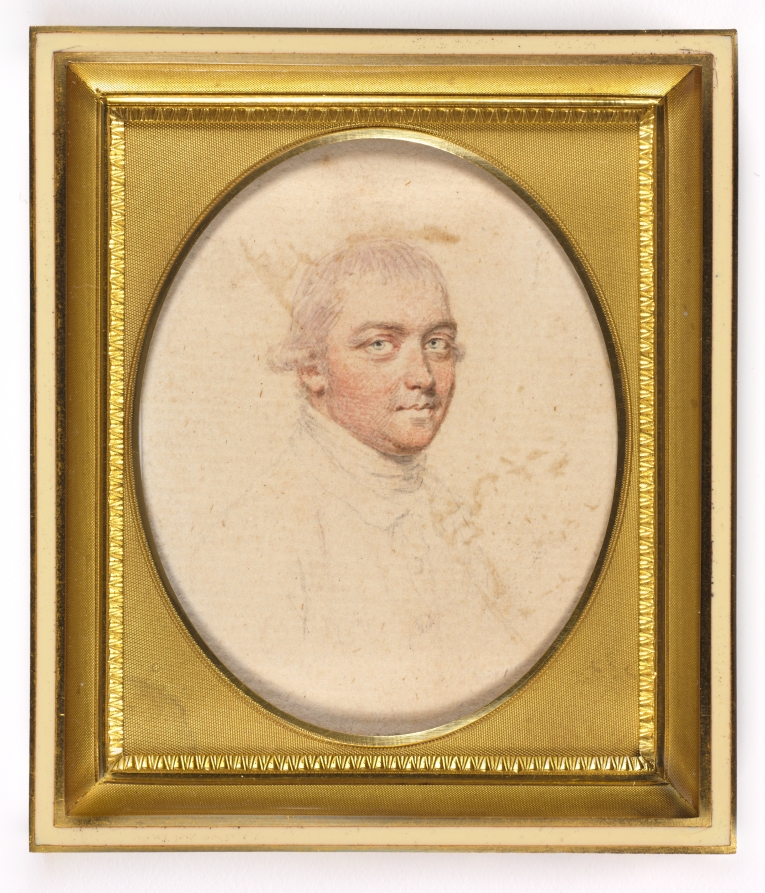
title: Portrait of Mr. Shippard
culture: England, 18th century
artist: John I Smart (British, 1741–1811)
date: c. 1776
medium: graphite and wash on laid paper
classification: Portrait Miniature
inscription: inscribed very faintly in graphite on front at upper right: 161; on back (paper backing to which drawing paper was adhered) inscribed in graphite, at top upside down: 161; also on paper backing in graphite, on a slant at lower left: Mr. Jones; inscribed on back of drawing, beneath paper backing, in graphite: Mr Shippar[d] large Bracelet size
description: Although it is impossible to say whether or not it was always part of the artist’s process to execute a preparatory sketch prior to painting each miniature, we do know that John Smart retained many hundreds of these sketches. A group of preparatory sketches—of which this portrait is one—descended through the Smirke family after Smart’s daughter Sarah gave a sketchbook containing preparatory portrait studies to her friend Mary Smirke, sister of the celebrated Victorian architect Sydney Smirke. This book was probably broken up around 1877 when its contents was divided between Sydney’s daughters Mary Jemmett and Mrs. Lange, whose portions were both sold at auction in 1928. G. C. Williamson was the first to suggest that Smart’s sketches were well known and that they were preparatory studies for the painted miniatures. Williamson listed the names of sitters from the sketches known to him at the time, and they include a Mr. Jones, the title formerly given to the sketch here. This designation was applied only to a paper backing that had been attached after the drawing had been removed from the sketchbook. There is no further evidence for this attribution, however. The sketch is of the sitter’s head only, with a slight suggestion of a high stock collar. His head faces to the left, and his light hair is combed straight back with a flat curl above his right ear. He is depicted in an oval, and the background is unpainted. The number 161 is inscribed in graphite on both the front of the drawing and its paper backing. Upon removal of the paper backing in 1993, an inscription in graphite was revealed. Perhaps written in the artist’s hand, it suggests that the sitter’s name may be Mr. Shippar[d]. There are no known portraits of this gentleman. The work can be dated to about 1776 because of its size, which, when painted on ivory, would have been around 2 inches in height. An inscription on the back of the drawing suggests that the miniature was to be mounted on a bracelet. To this date, the finished ivory for which this preparatory sketch was presumably undertaken has not been discovered.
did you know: Sketches helped John Smart work out the particulars of a portrait before commencing the miniature on ivory, and they were useful in the event that a duplicate might later be required.